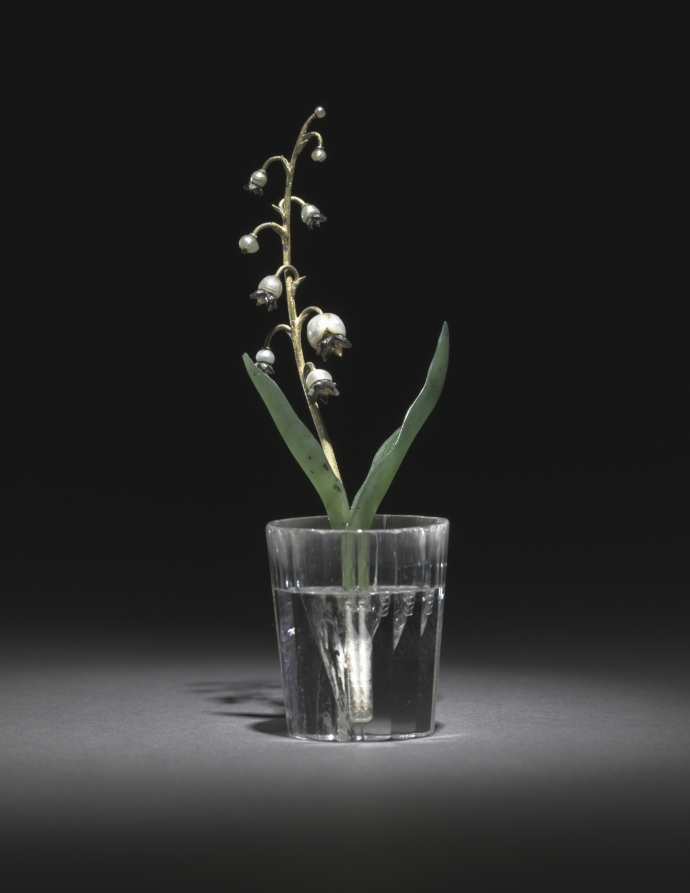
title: Flower Study of a Lily of the Valley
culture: Russia, St. Petersburg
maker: House of Fabergé (Russian, 1842–1918)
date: c. 1885–1915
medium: pearls, diamonds, jade, rock crystal, silver, gold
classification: Miscellaneous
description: This flower study resembles a stem of lily-of-the-valley. Fabergé’s inspiration for his flower studies is said to have come from the floral brooches of precious stones that were made in the 1700s for Catherine the Great as well as from the Japanese art of flower arranging, known as ikebana. Small and delicate, Fabergé’s flower studies were given as intimate gifts to friends by the tsarina and others in the court. She also liked to take them around to wherever the imperial family was residing as a reminder of spring during the harsh Russian winters.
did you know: The stems of Fabergé’s flower studies are set into little basins carved from rock crystal to resemble pots of water.